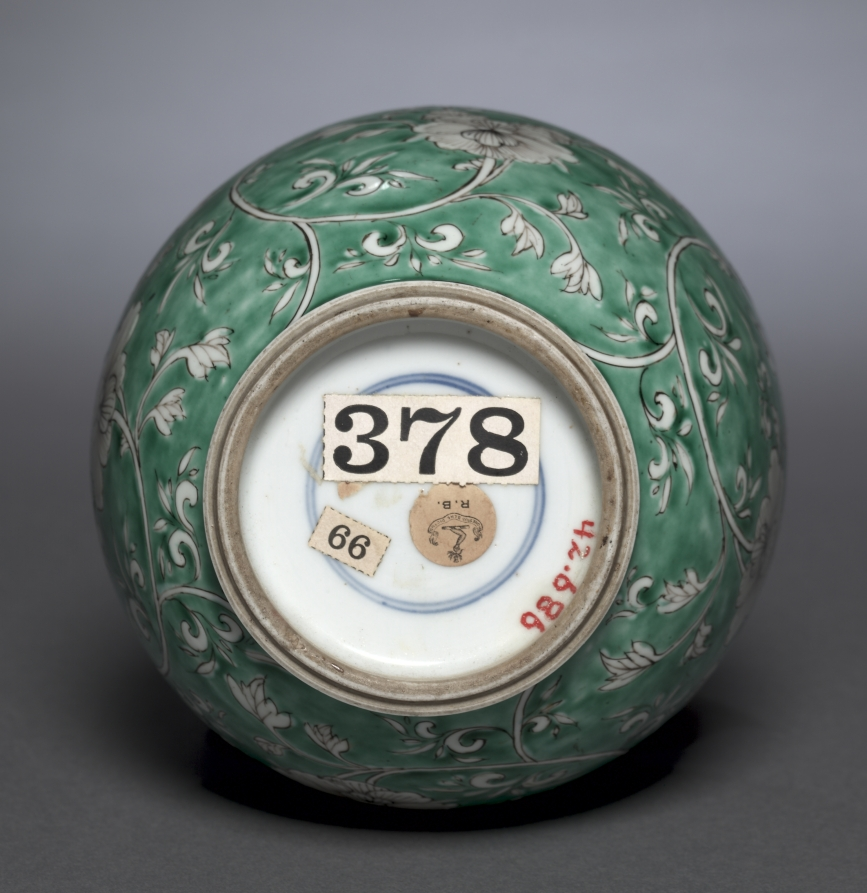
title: Bottle Vase with Floral Scrolls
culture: China, Qing dynasty (1644-1911), Kangxi reign (1661-1722)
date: 1662–1722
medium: porcelain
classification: Ceramic